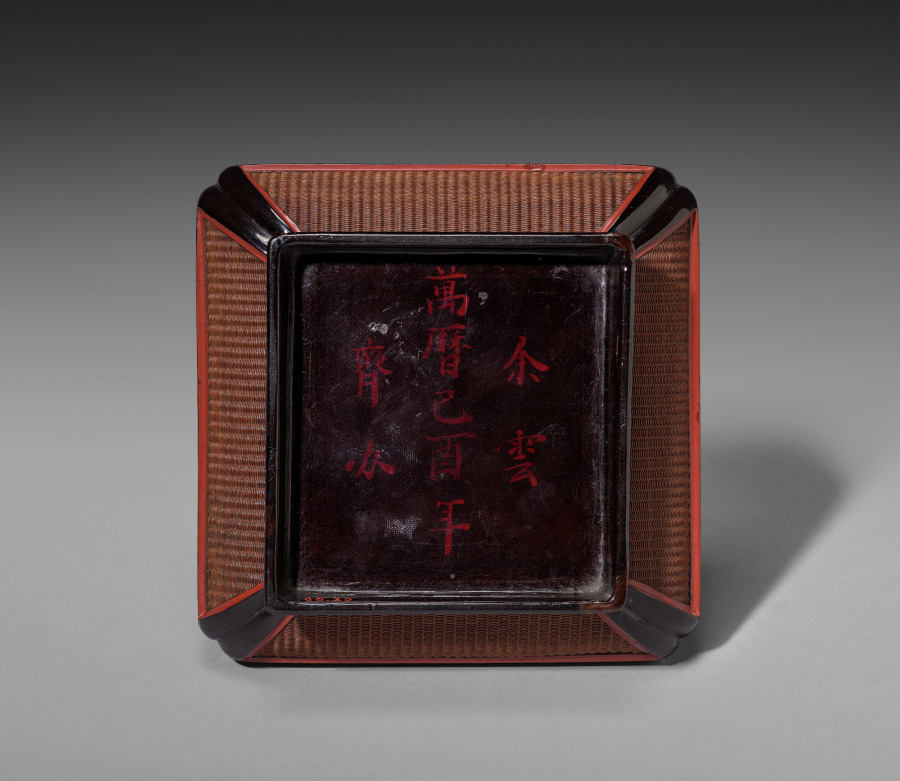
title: Wickerwork Box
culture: China, Ming dynasty (1368-1644), Wanli reign (1572-1620)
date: 1609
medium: lacquered wickerwork (of woven bamboo) framed in wood with circular scene inlaid in mother-of-pearl and gold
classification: Lacquer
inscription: Inscription at bottom in red on black lacquer reads: "commissioned by Yü-Yün-ch'i".